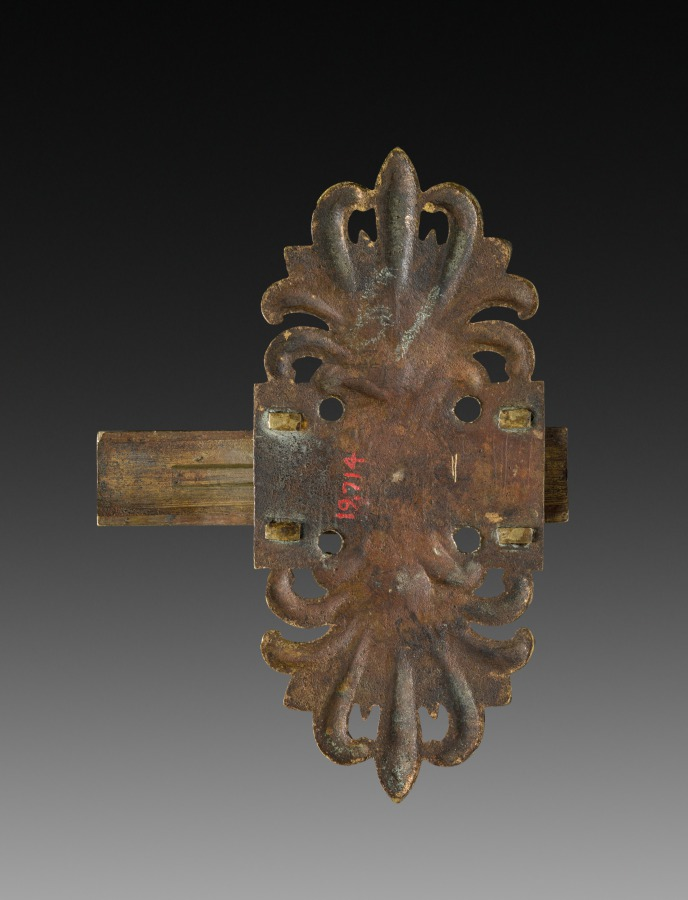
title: Ornamental Bolt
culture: France, early 19th century, Empire Style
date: c. 1800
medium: gilt bronze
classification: Metalwork